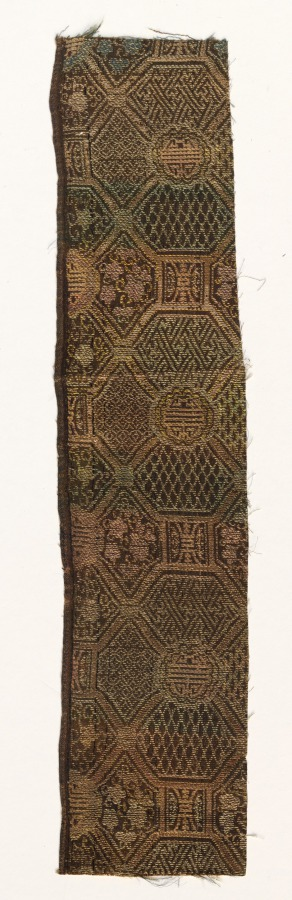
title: Fragment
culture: China, 19th century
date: 1800s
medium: silk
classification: Textile